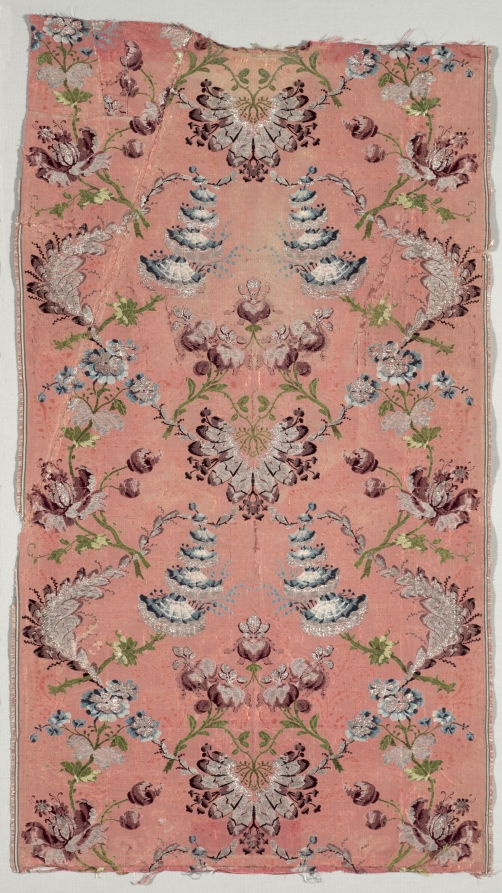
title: Length of Textile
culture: France, 18th century, Period of Louis XV (1723-1774)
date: 1723–1774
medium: brocade; silk and metal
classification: Textile